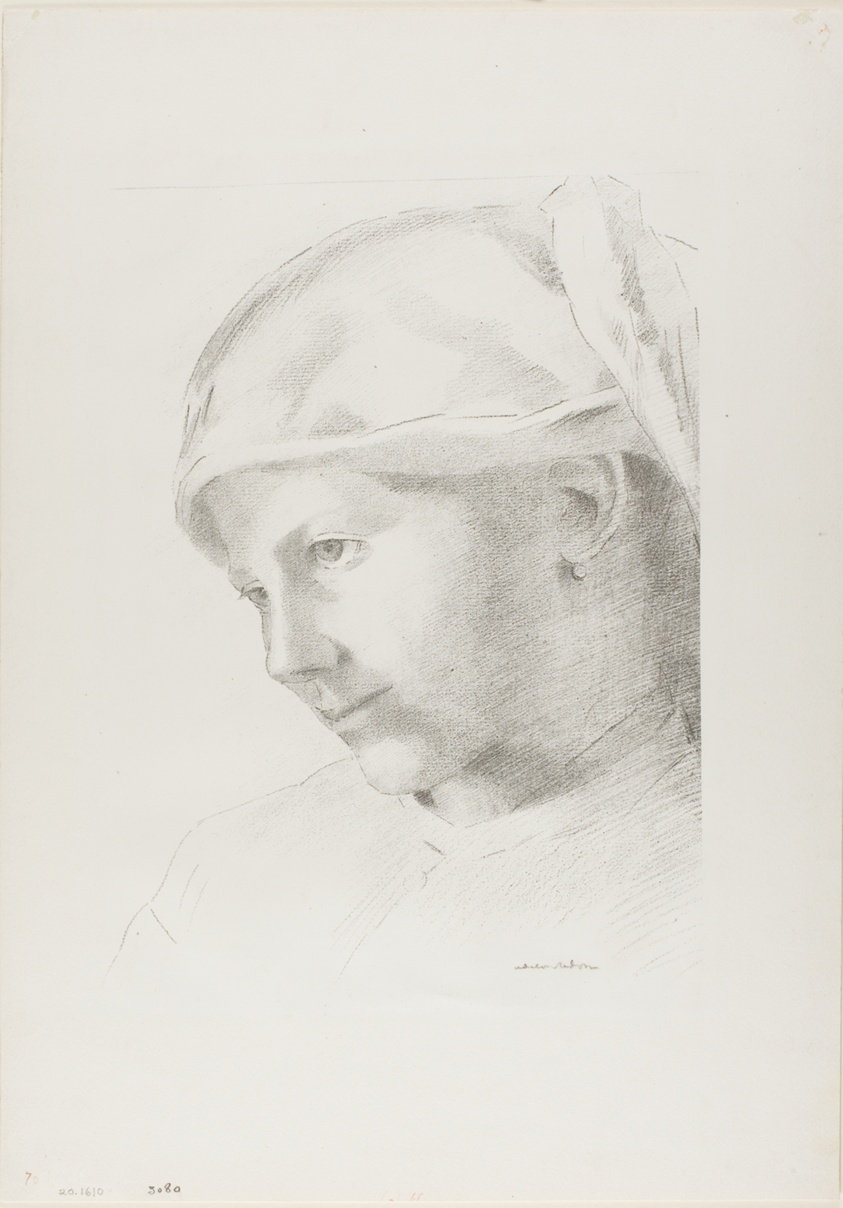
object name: Print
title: Girl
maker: Odilon Redon (French, 1840-1916)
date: 1887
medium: Lithograph in black on white wove paper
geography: France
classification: lithograph; print; prints and drawing; paper